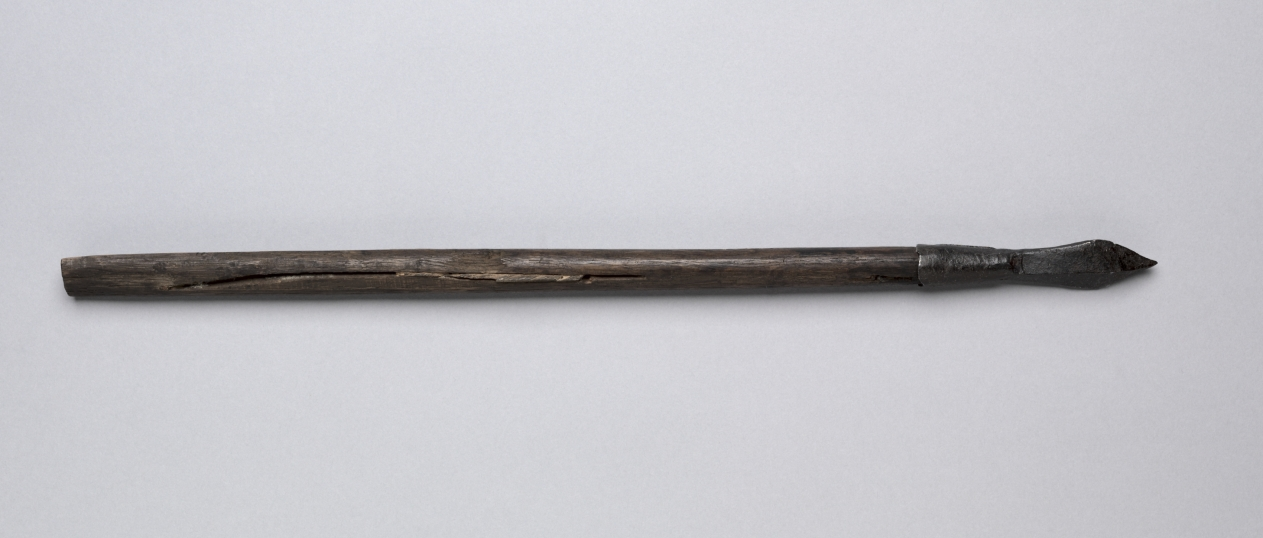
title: Crossbow Bolt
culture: Germany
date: 1500s-1600s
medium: wood, leather, steel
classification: Arms and Armor